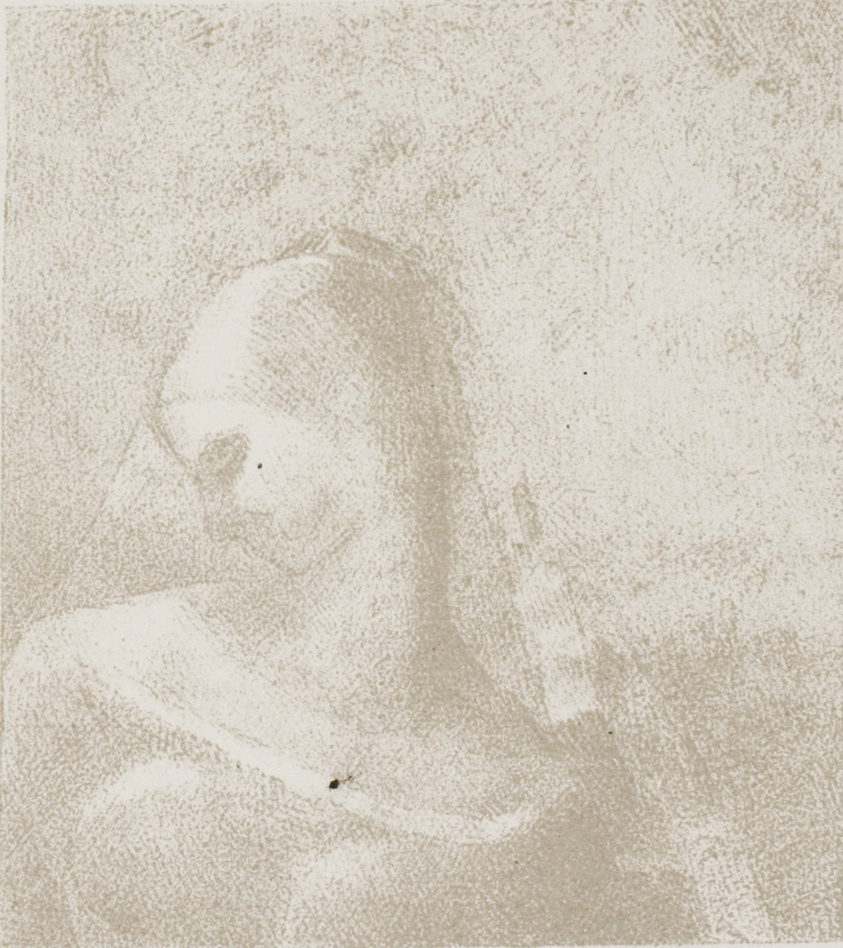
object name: Print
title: Helen - Ennoia, plate 10 of 24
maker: Odilon Redon (French, 1840-1916)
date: 1896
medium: Lithograph in gray-green on heavy ivory wove paper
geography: France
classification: lithograph; print; prints and drawing; paper